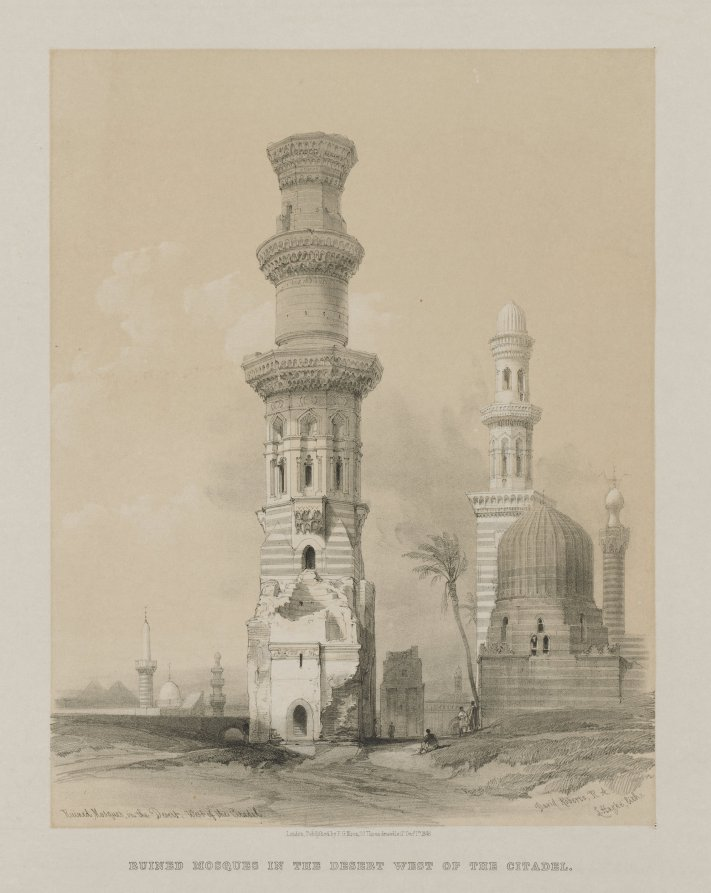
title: Egypt and Nubia, Volume III: Ruined Mosques in the Desert, West of the Citadel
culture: England, 19th century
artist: Louis Haghe (British, 1806–1885)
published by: F. G. Moon, 20 Threadneedle Street, London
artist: after David Roberts (Scottish, 1796–1864)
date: 1849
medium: color lithograph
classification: Print